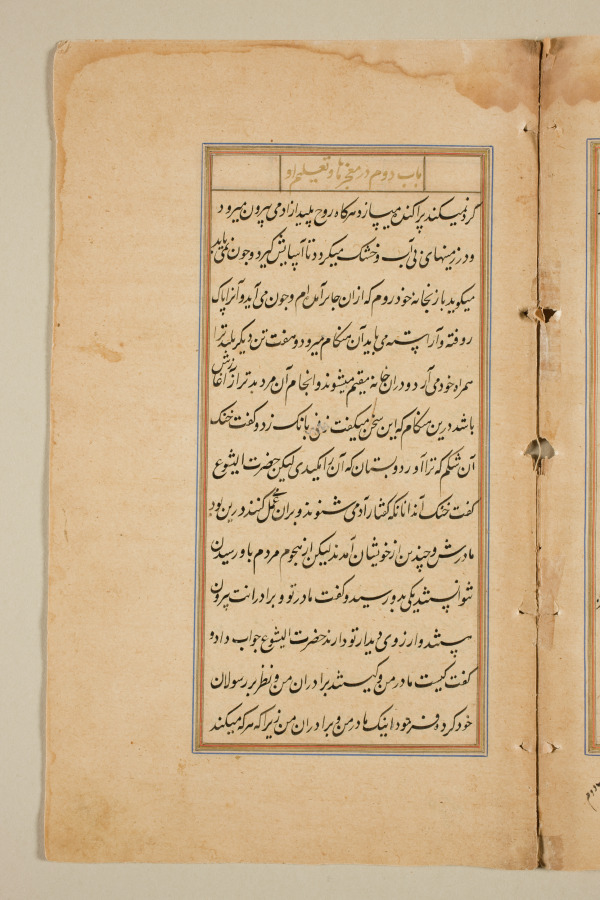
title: Text page from a Mirror of Holiness (Mir’at al-quds) of Father Jerome Xavier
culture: Mughal India, Allahabad, made for Prince Salim (1569–1627)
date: 1602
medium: Ink and gold on paper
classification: Manuscript